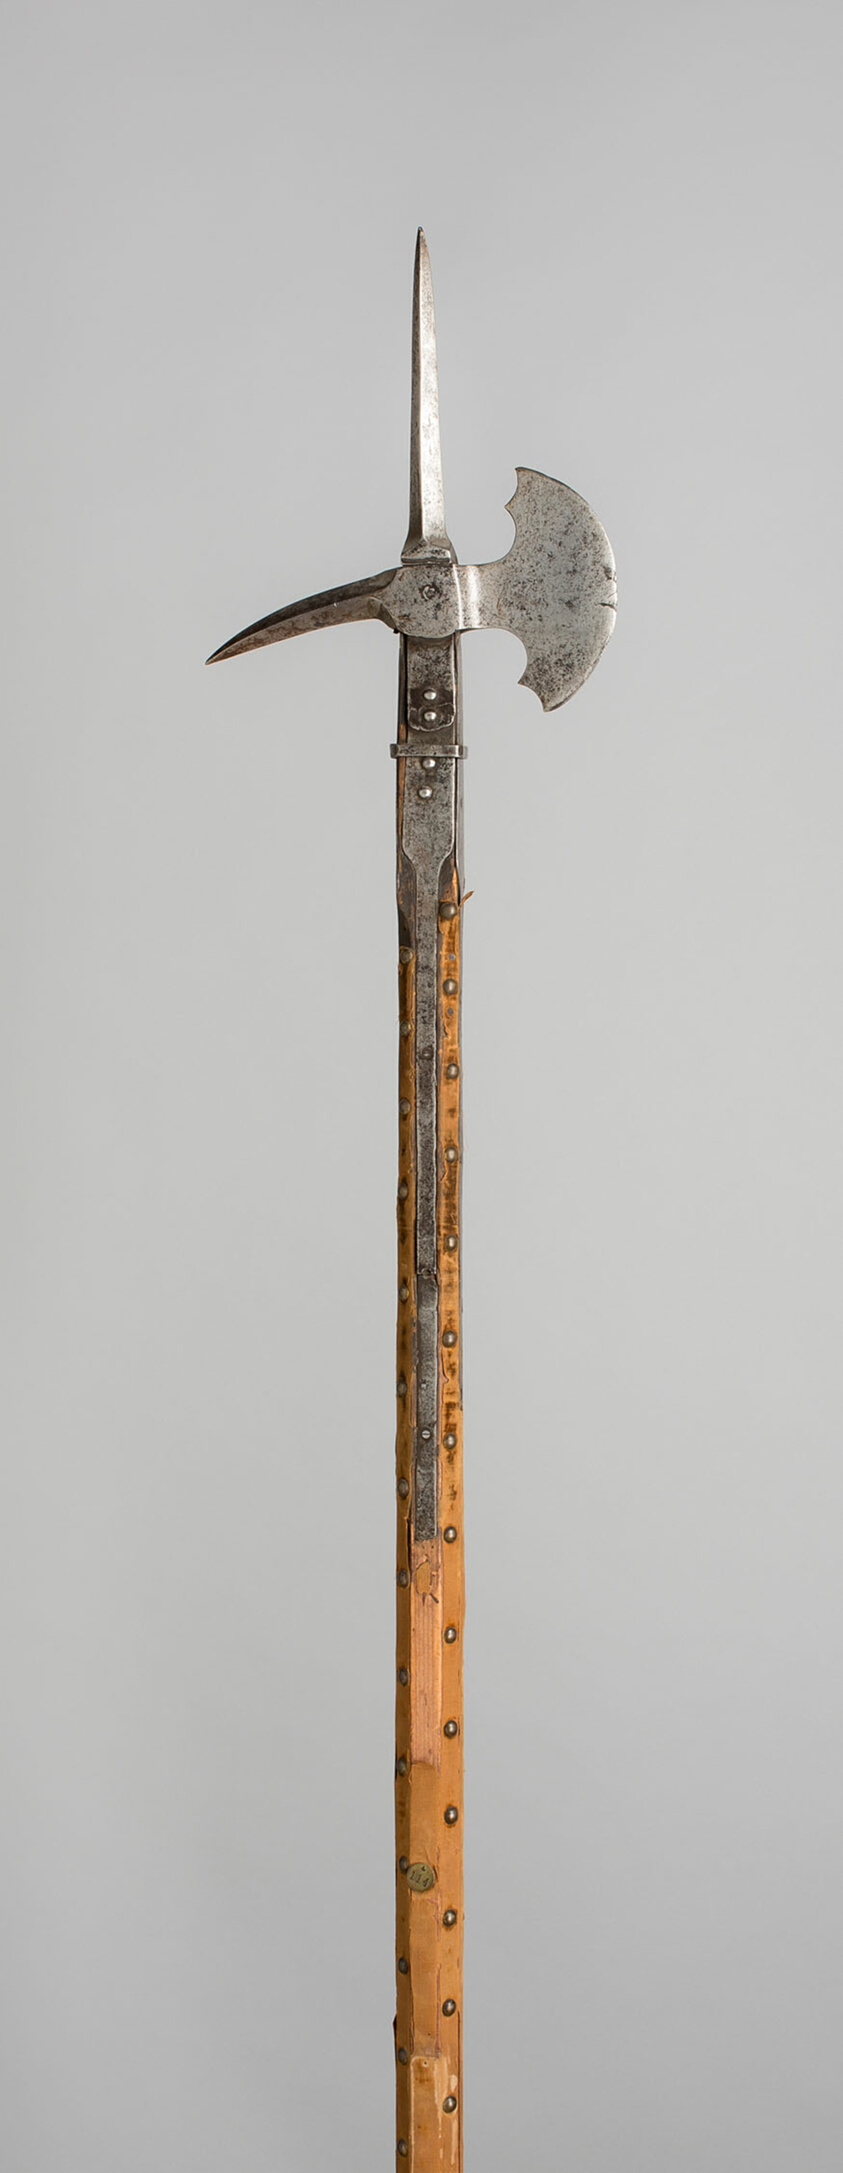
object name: Arms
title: Poleaxe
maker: Swiss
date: 1500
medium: Steel, iron, wood (pine), brass, and velvet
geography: Switzerland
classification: edged weapon-staff; arms; arms and armor